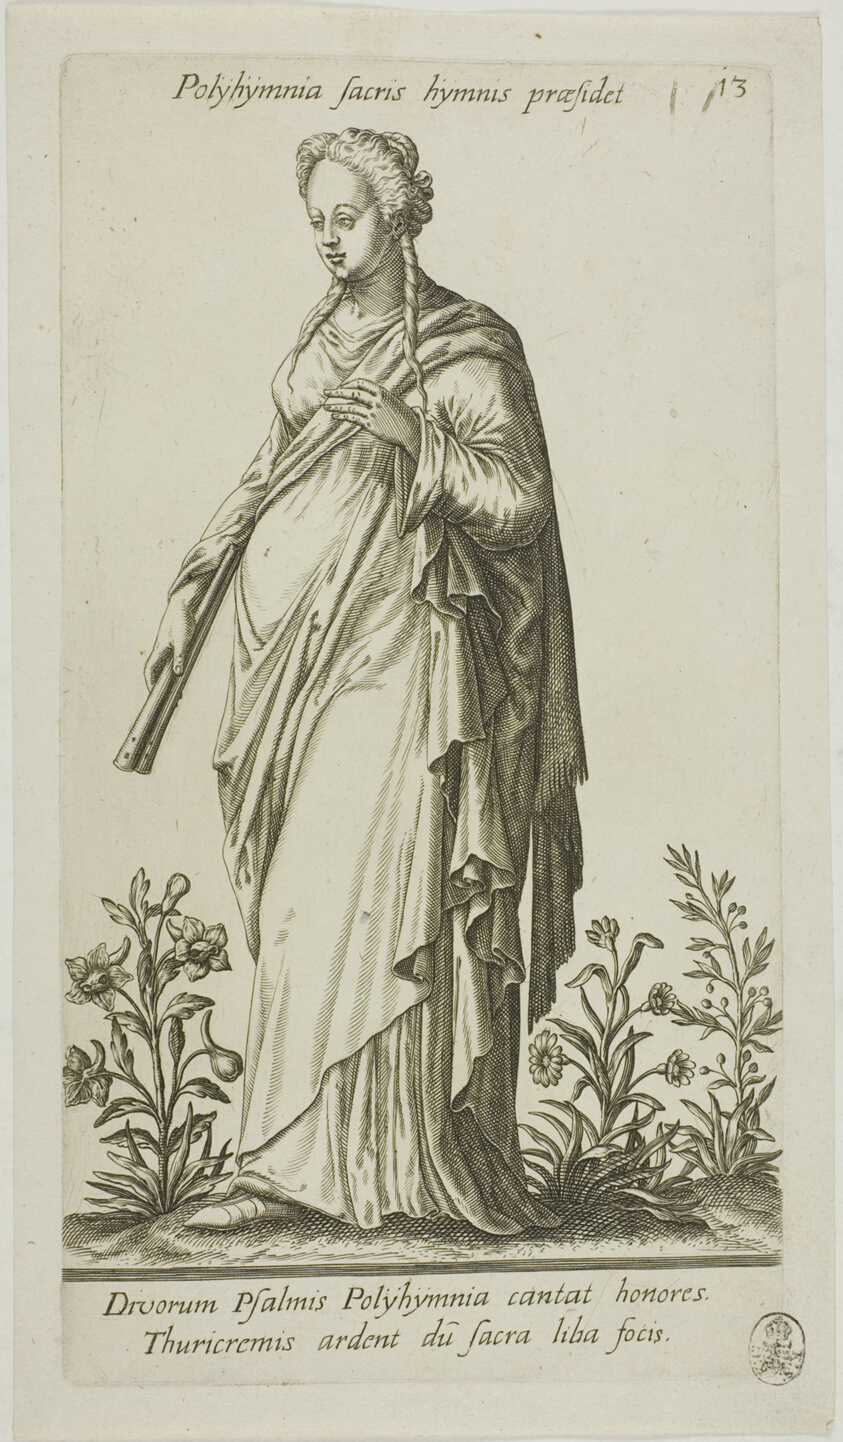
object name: Print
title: Polyhymnia, Muse of Hymns, plate 13 from Parnassus Biceps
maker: Johann Theodor de Bry (German, 1561-1623); or Robert Boissard (French, c. 1570-after 1597); after Jean-Jacques Boissard (French, 1533-1598)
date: 1601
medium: Engraving in black on ivory laid paper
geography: Frankfurt an der Oder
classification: engraving; print; prints and drawing